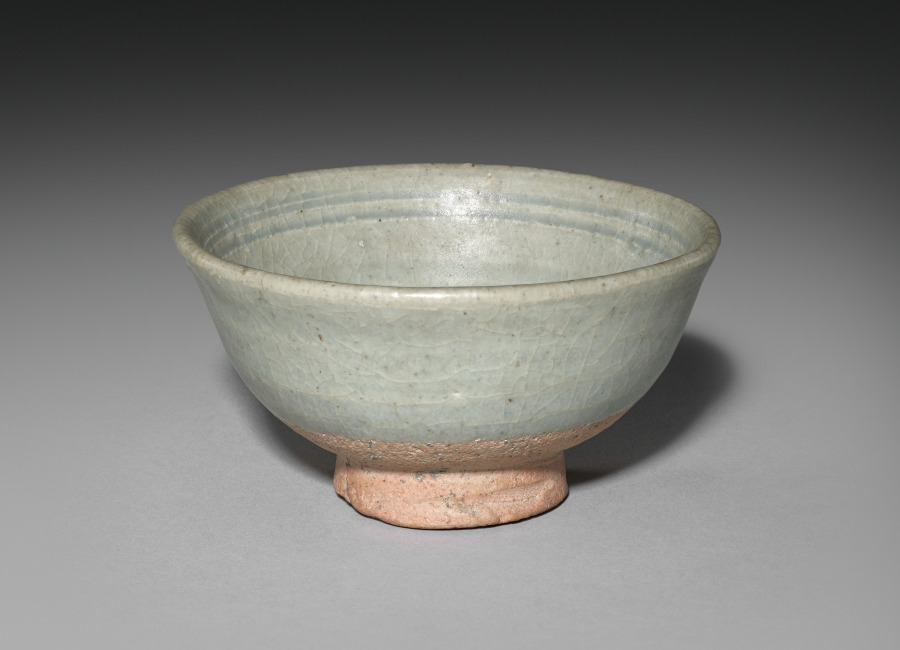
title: Bowl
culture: Siam, Sawankhalok ware, late 13th-14th Century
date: late 1200s-1300s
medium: stoneware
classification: Ceramic